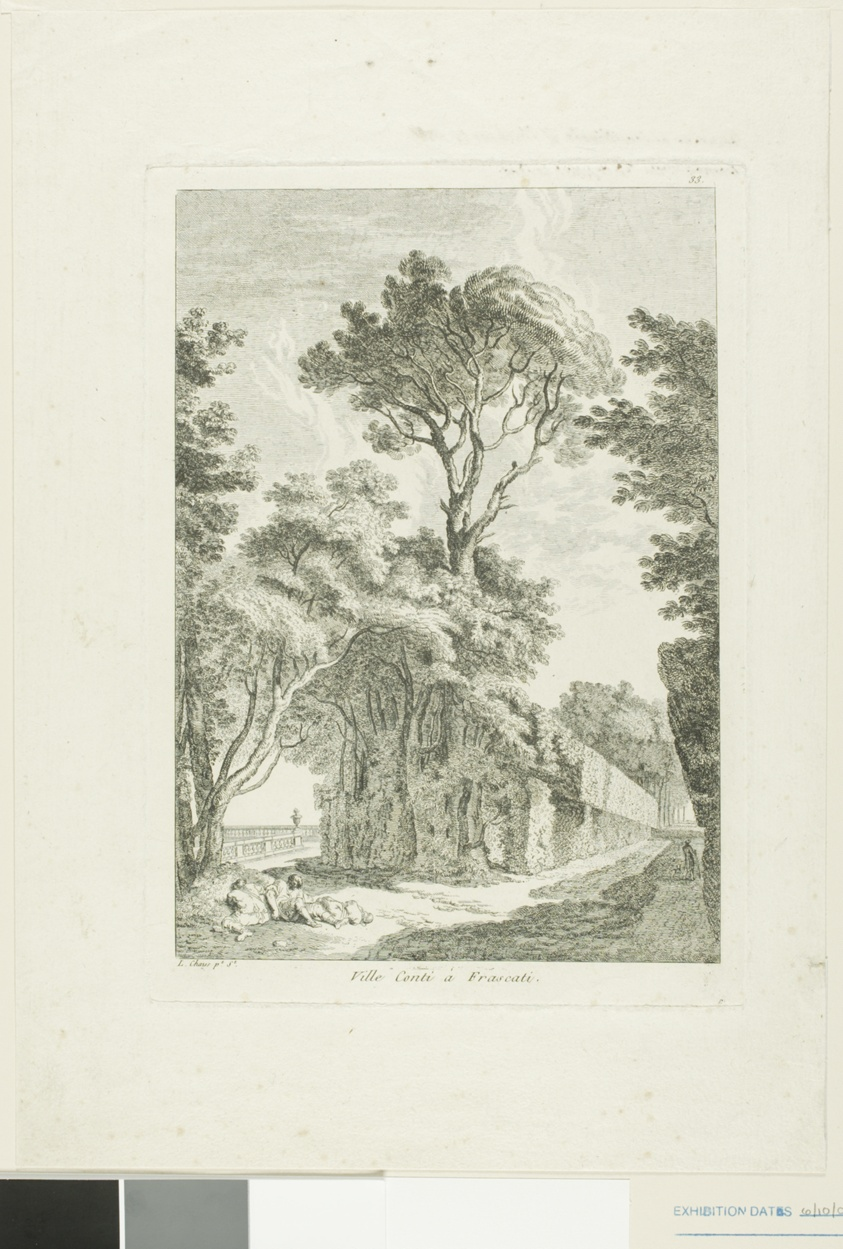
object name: Print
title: The City of Conti in Frascati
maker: Louis Chaix (French, 1800-1824)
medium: Etching on ivory laid paper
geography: France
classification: etching; print; prints and drawing